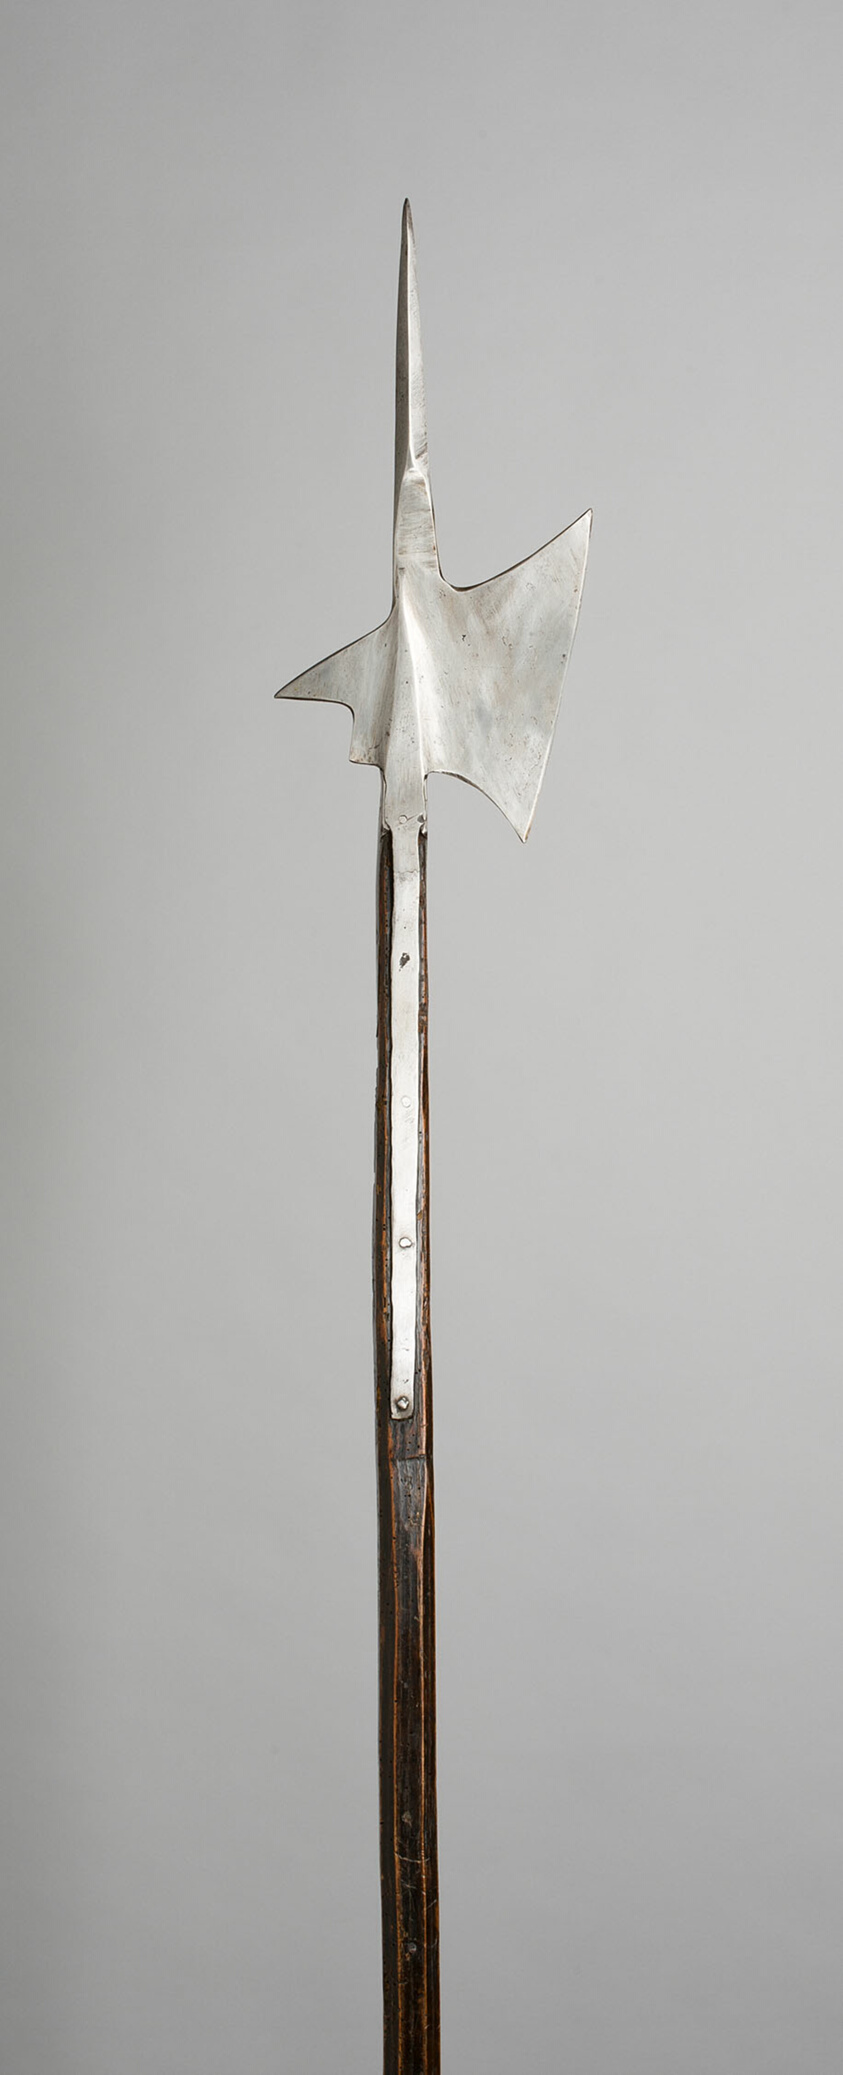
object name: Arms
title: Halberd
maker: German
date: 1500-50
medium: Steel and wood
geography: Germany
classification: edged weapon-staff; arms; arms and armor